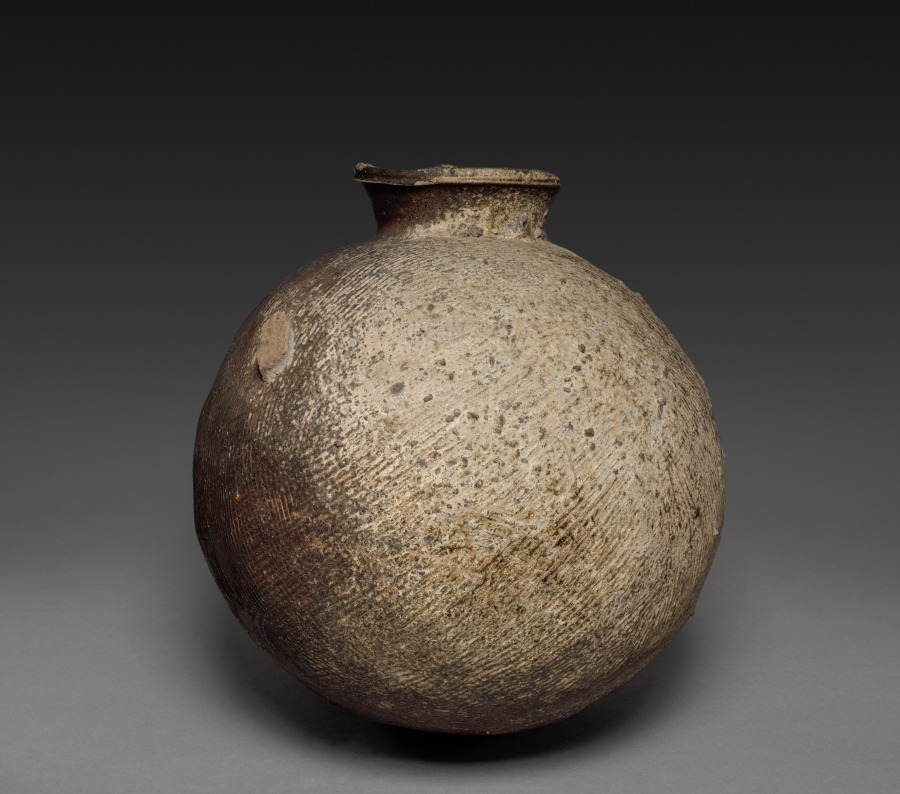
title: Jug with Oblong Body: Sueki Ware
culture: Japan, Nara period (710–94)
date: 700s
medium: stoneware, with impressed decoration and natural ash glaze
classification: Ceramic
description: The unusual shape of this sturdy vessel derives from two deep bowl forms being joined together at their mouths. An opening was then cut out where the separately formed neck and mouth were attached. This vessel shape came to early Japan from Korea, as did the paddled surface decoration technique.The jug's rich surface tonalities were created by wood ash in the kiln chamber that settled on the vessel during firing. The mottled gray areas indicate where large accumulations of ash adhered to the hot body. The darker, green skin that appears shiny or reflective represents generous ash accumulations that vitrified, becoming a natural green glaze. In one area this accumulation is so rich that it formed rivulets of glassy green glaze, propelled across the black matte surface by the fiery winds coursing within the kiln.